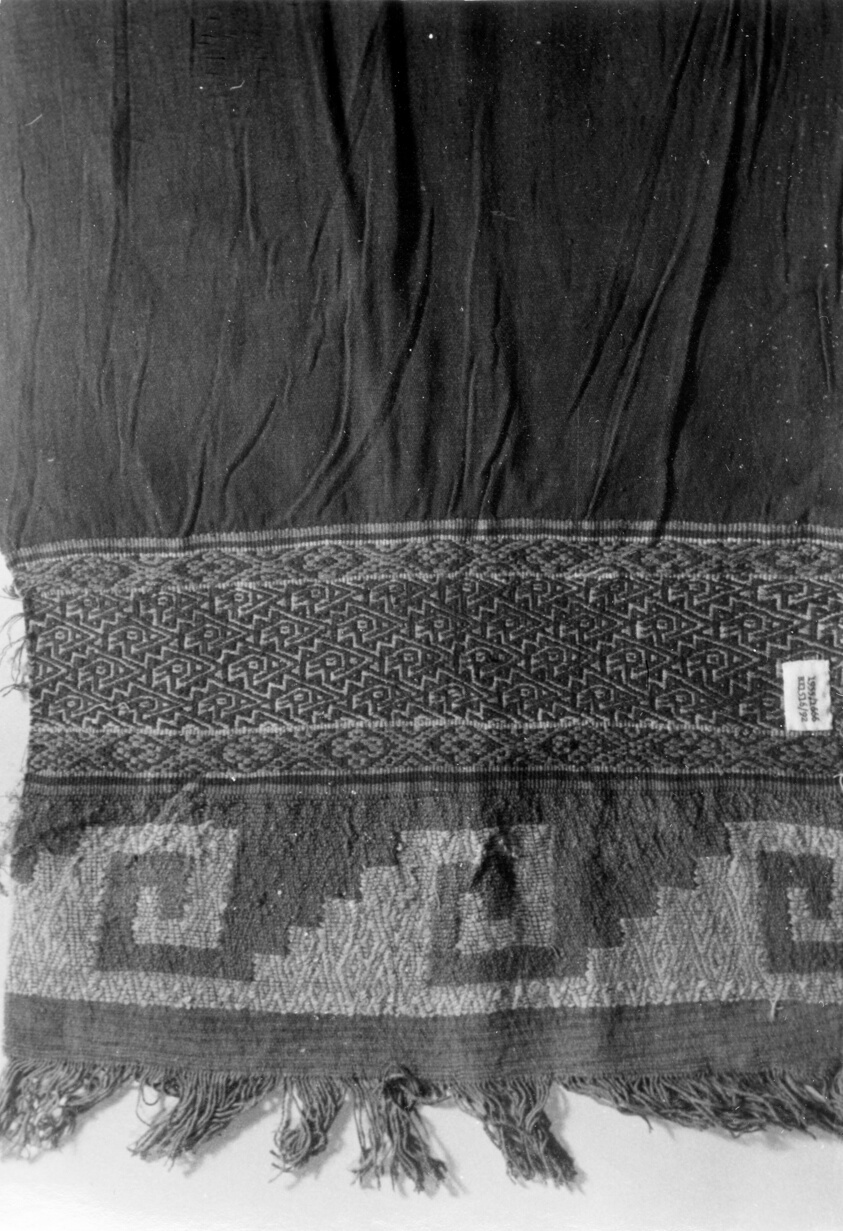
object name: Textile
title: Fragment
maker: Probably central coast, Peru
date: A.D. 1000/1476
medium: Plain brown cloth, compound border. Border put in with needle and darning stitch on plain brown cloth. Woven fringe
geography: Peru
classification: textile; weaving